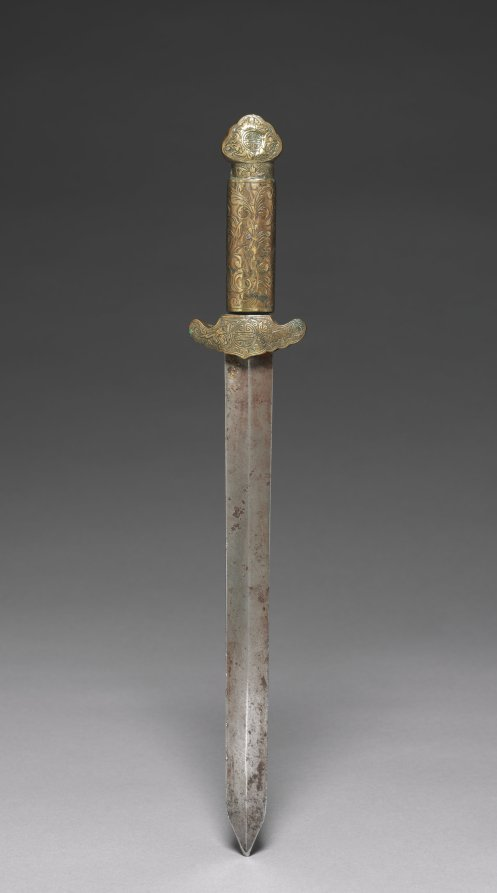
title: Dagger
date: 1800s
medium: metal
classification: Arms and Armor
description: This is a typical 19th-century double-edge short sword. The image of bats was chosen to decorate the brass mount because of their association with the idea of longevity and happiness.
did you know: This double-edged short sword is a typical 19th-century example.